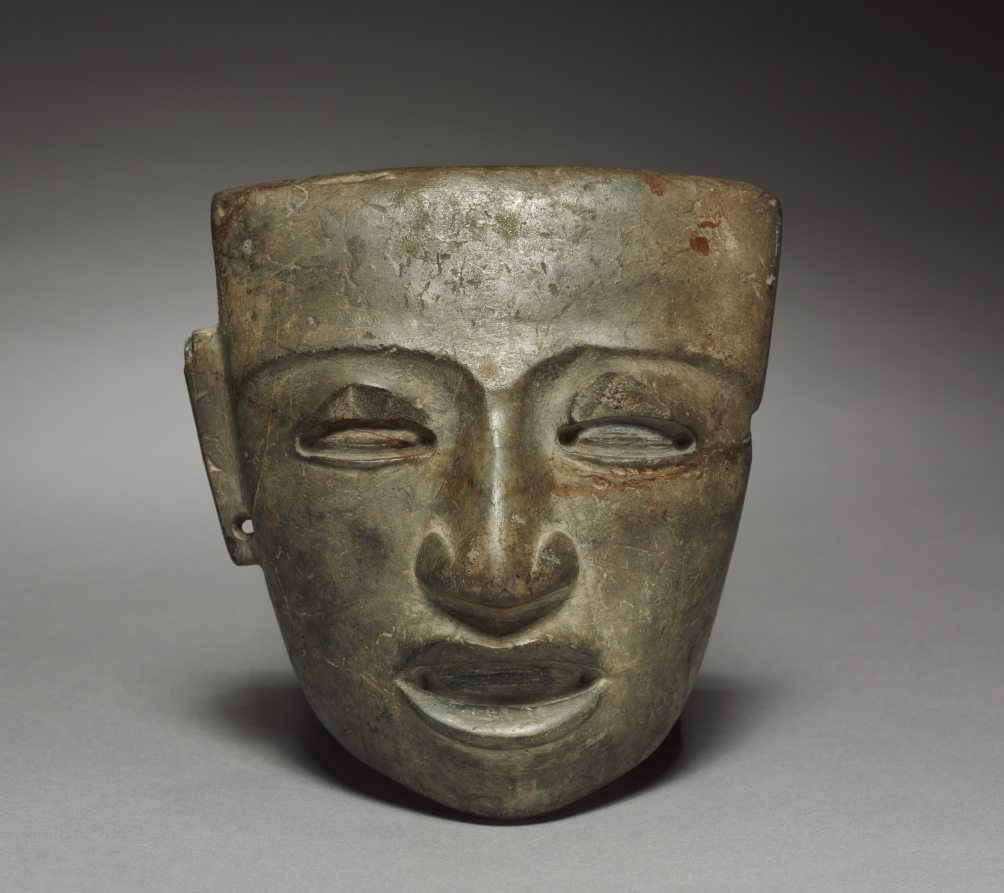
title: Mask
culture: Central Mexico, Teotihuacán style, Classic period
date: 1–550 CE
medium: stone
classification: Sculpture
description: Many Teotihuacán masks were once tied to something via holes on the back--perhaps a body-shaped form dressed in garments, ornaments, and a headdress that identified the figure. The stone masks’ eyes and mouths once held inlays representing irises, pupils, and teeth.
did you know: These stone masks have been found near temples, but not in homes or burials.